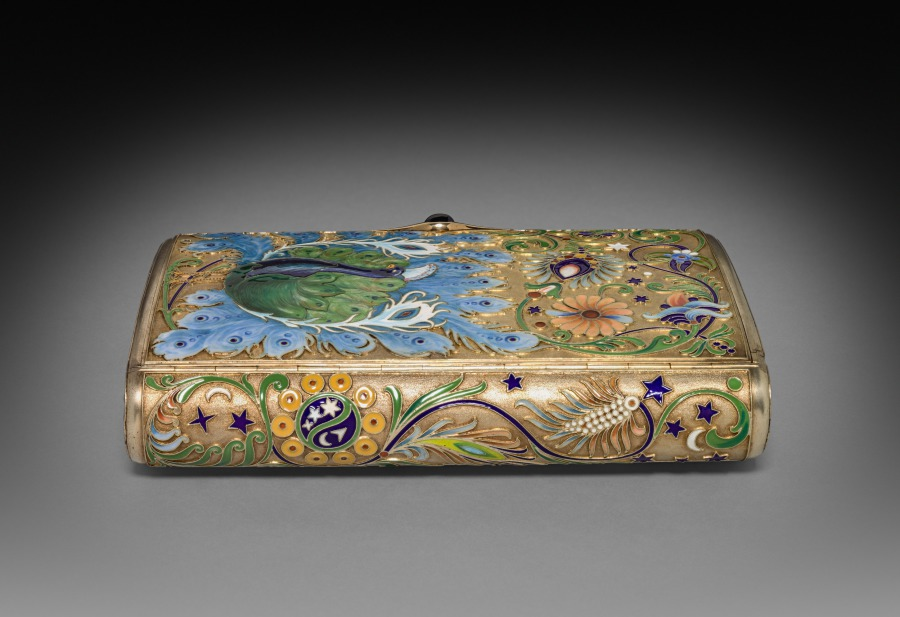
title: Cigar Box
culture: Russia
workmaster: attributed to Feodor Ivanovich Rückert (Russian, 1840–1917)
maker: House of Fabergé (Russian, 1842–1918)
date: c. 1896–1908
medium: Silver gilt, enamel, sapphire set in gold; [reproduction silk tinder cord, gold and moonstone catch]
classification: Silver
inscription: C. Fabergé (in Cyrillic); double-headed eagle [imperial warrant]; 84, Kokoshnik, tester's initials [assay mark for Moscow, 1896-1908]; scratched 16358.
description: Fabergé’s craftsmen in Moscow became known for their work in the pan-Slavic or neo-Russian taste, hearkening back to 17th-century styles of Russian folk decoration. In this whimsically oversized box for cigars or loose tobacco, Fabergé used the technique to highlight a symbol of imperial royalty, the preening peacock, here rendered in brilliant hues of blue and green enamels.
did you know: Peacocks were considered a symbol of imperial royalty in Russia.